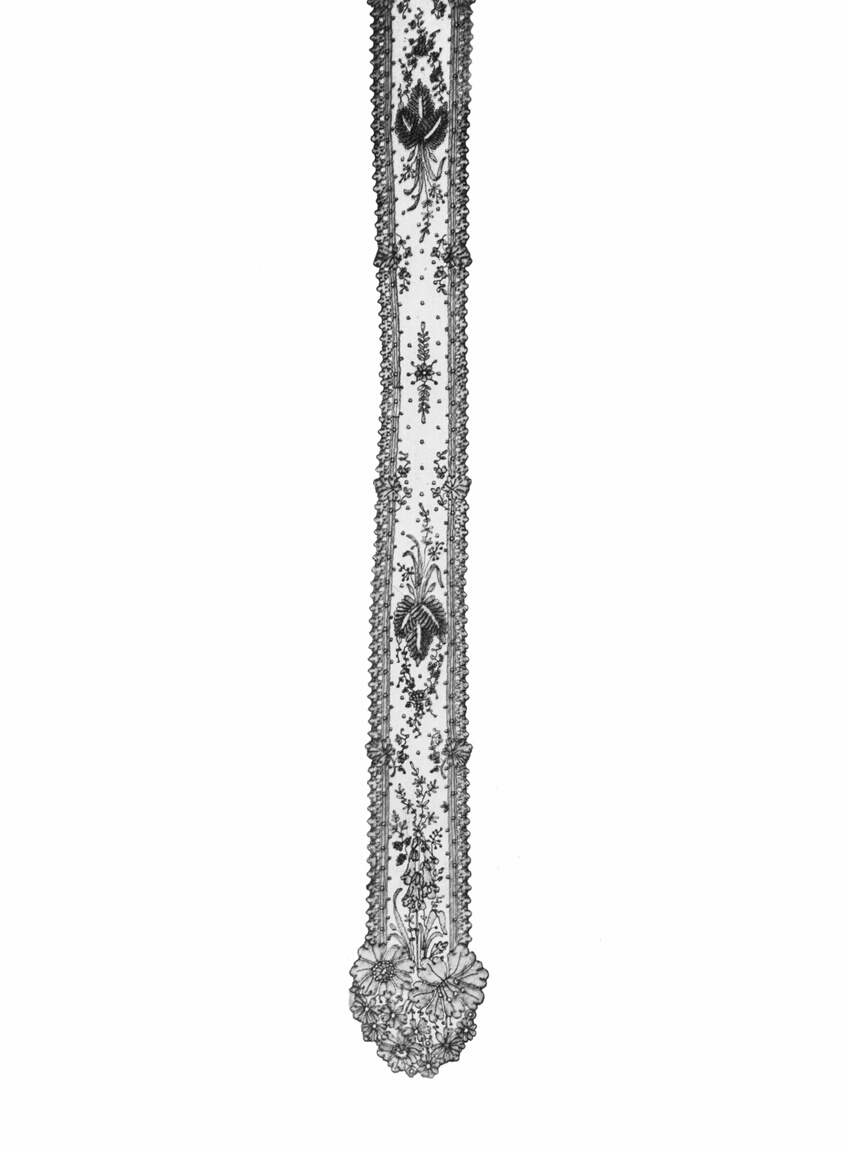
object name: Costume and Accessories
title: Pair of Lappets (Joined)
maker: France, Bayeux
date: 1801/1900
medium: Silk, bobbin straight lace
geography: Bayeux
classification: costume accessory; lace - bobbin; textile; costume; costume accessory - headdress; costume accessory worn above the waist